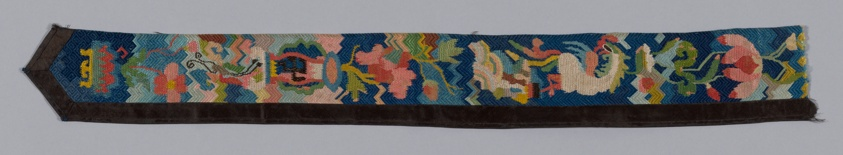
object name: Costume and Accessories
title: Band or Border (from Woman's Garment)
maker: China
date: 1875/1900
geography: China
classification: textile; needlework - costume; needlework (visual works); costume